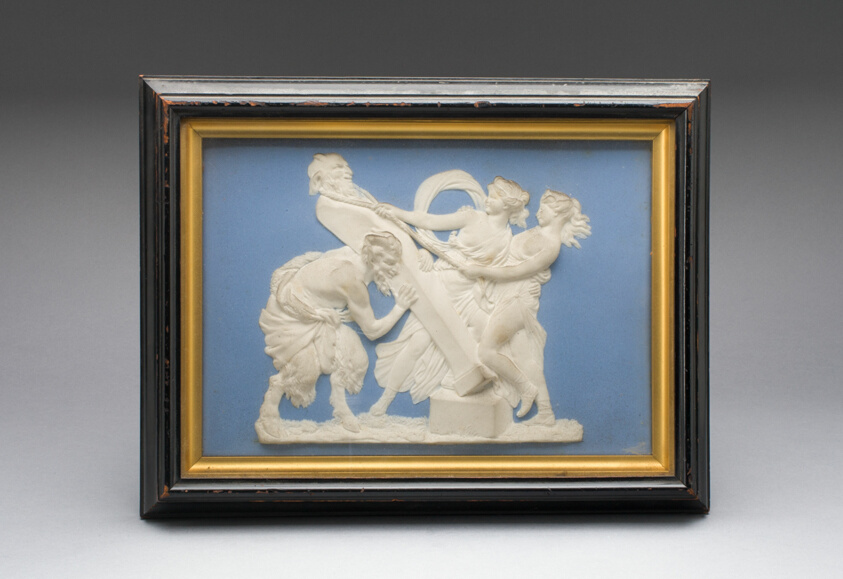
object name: Ceramics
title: Plaque with Bacchantes and Satyr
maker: Wedgwood Manufactory (England, founded 1759)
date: c. 1800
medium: Stoneware (jasperware)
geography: Burslem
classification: sculpture; ceramics; stoneware; european decorative arts